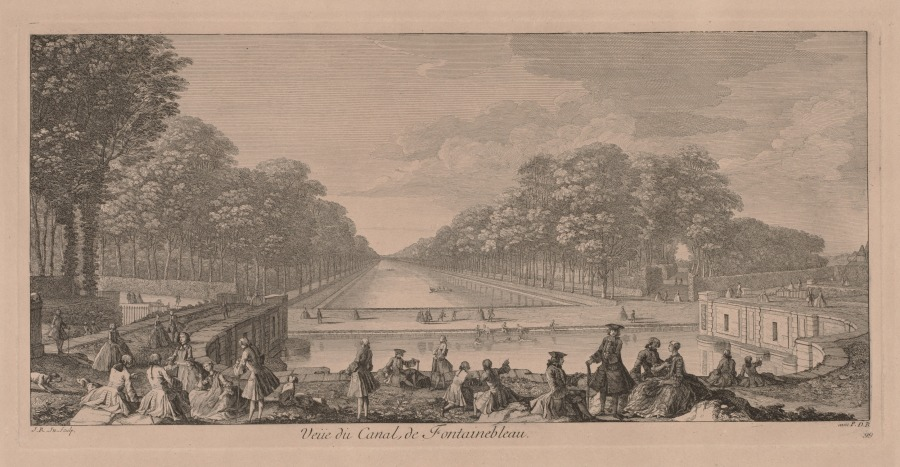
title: The Canal at Fontainebleau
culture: France, 18th century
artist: Jacques Rigaud (French, 1681–1754)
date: c. 1720–50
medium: engraving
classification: Print